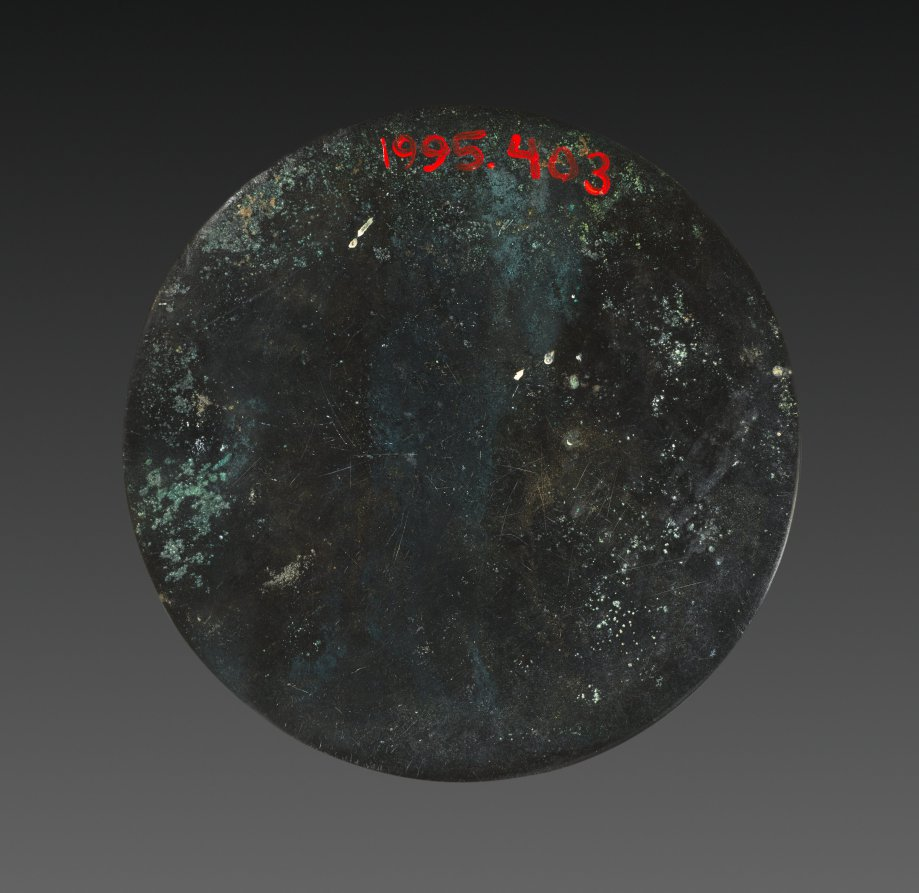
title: Mirror with Four Leaves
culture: Eastern Anatolia or Northern Mesopotamia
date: 1100s–1200s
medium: bronze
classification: Metalwork